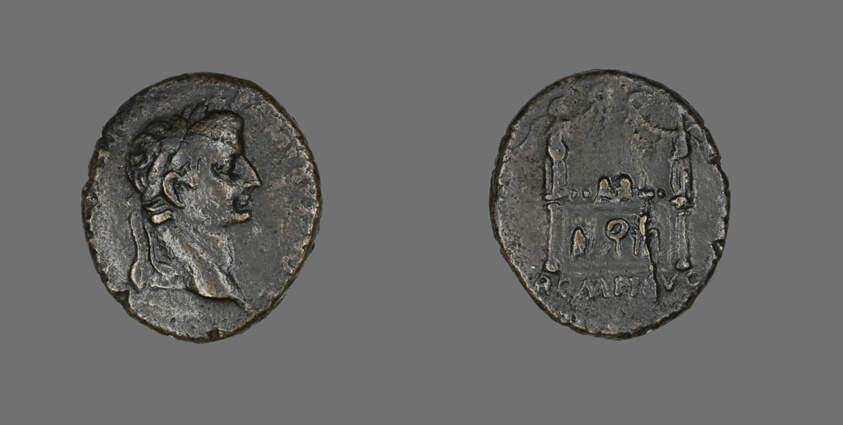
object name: Coin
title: Coin Portraying Emperor Tiberius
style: roman (ancient, style or period), ancient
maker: Roman, minted in Lugdunum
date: 9-14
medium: Bronze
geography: Roman Empire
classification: coin; ancient art